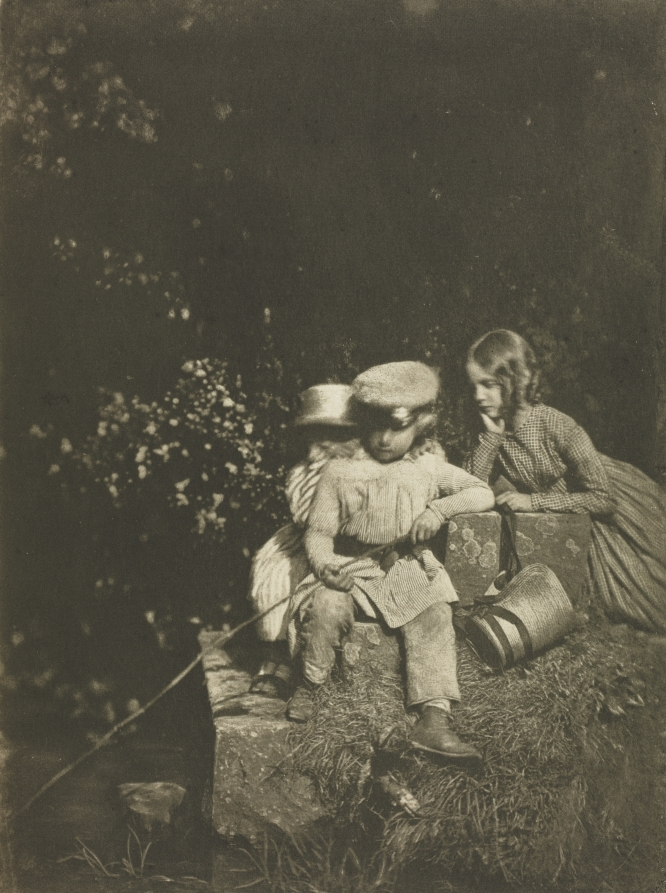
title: Camera Work: The Minnow Pool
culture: England, 20th century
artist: David Octavius Hill (British, 1802–1870)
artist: and Robert Adamson (British, 1821–1848)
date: 1909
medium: photogravure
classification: Bound Volume